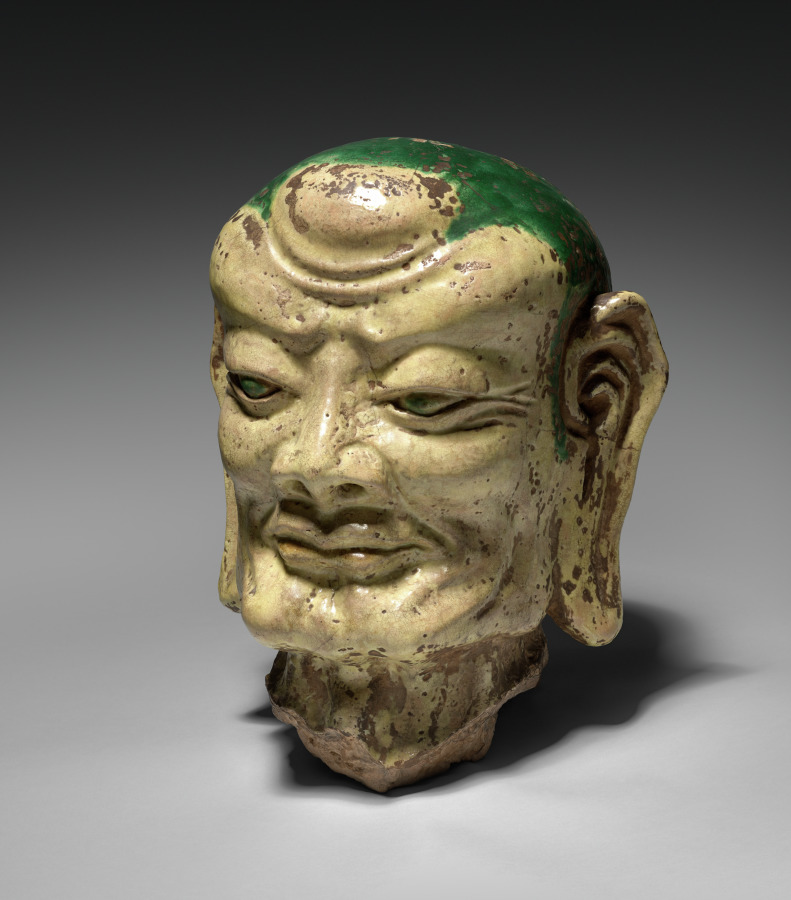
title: Head of a Lohan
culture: China, Ming dynasty (1368–1644)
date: 1368–1644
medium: earthenware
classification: Sculpture